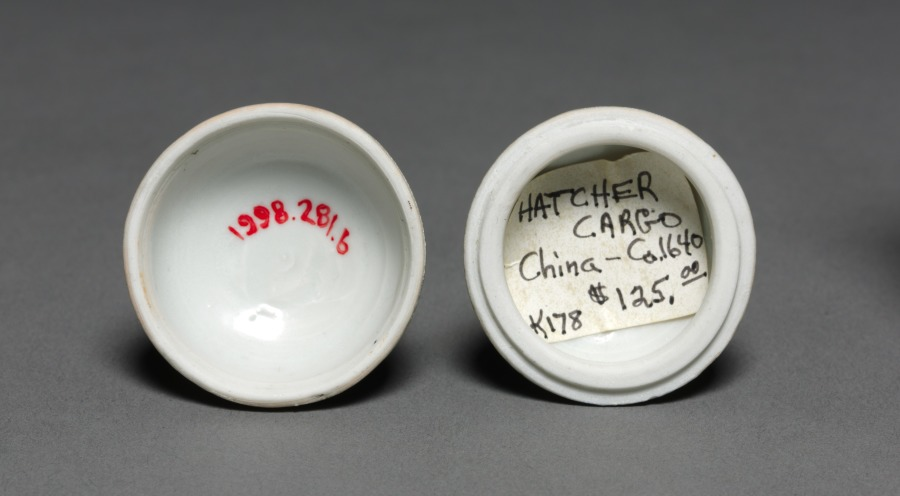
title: Pill Box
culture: China, Qing dynasty (1644-1911)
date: c. 1752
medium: porcelain with blue and white decoration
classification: Ceramic